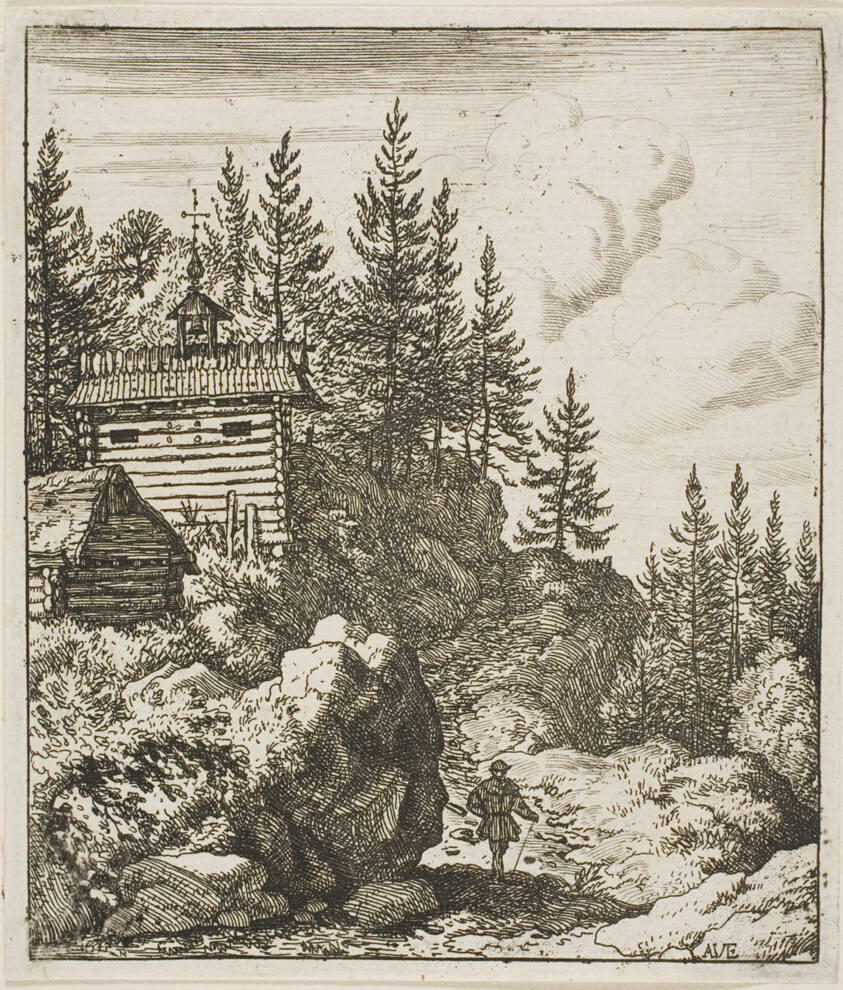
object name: Print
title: The Chapel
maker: Allart van Everdingen; Dutch, 1621-1675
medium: Etching on paper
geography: Holland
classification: etching; print; prints and drawing